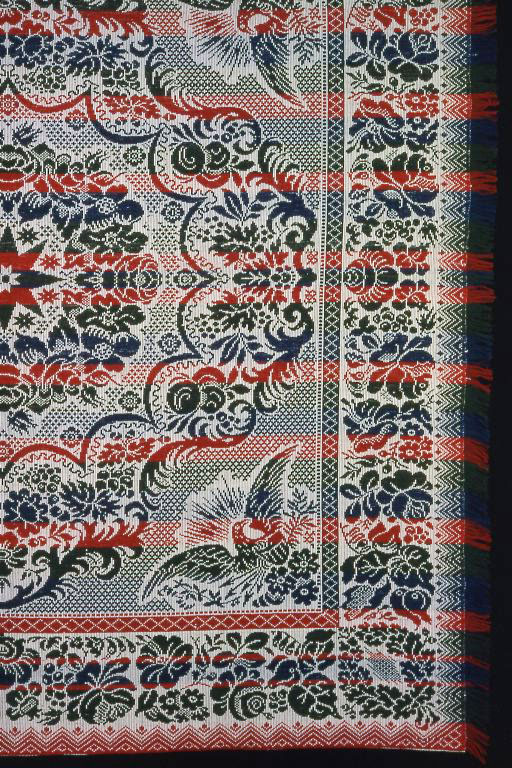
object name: Textile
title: Coverlet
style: 19th century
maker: United States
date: 1870/76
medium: Cotton and wool, plain weave with plain interlacings of secondary binding warps and patterning wefts (Beiderwand); woven on loom with Jacquard attachment; full loom width; seamless; fringed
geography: United States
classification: weaving - coverlet; coverlet; weaving; textile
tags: eagles, zigzags, wreaths, diamond shapes, vines, fruit, roses, flowers, foliage, scalloping, star, arrows, medallions, coverlet